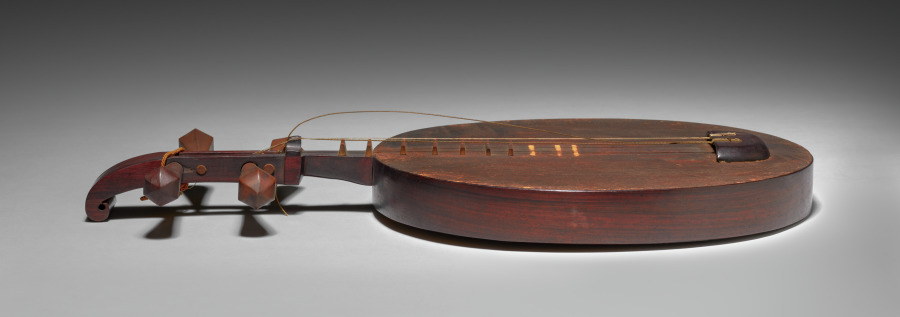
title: Moon Lute (Yueqin)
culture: China, Qing dynasty (1644-1911)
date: 1800s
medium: Rosewood, wutong (paulownia) wood, and gut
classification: Musical Instrument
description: Its resemblance to the full moon (yue 月) gives the yueqin its name. Found in popular ensembles, the Beijing and folk (jingxi) operas and used to accompany song, the yueqin has only recently been embraced by the modern Chinese orchestra. The player presses the strings between the frets making chord playing difficult but giving increased control over the timbre and intonation. Strings are plucked with fingernails or a pick using up-and-down strokes and tremolo techniques that sustain and provide color to a tone. It is known as gekkin in Japan.